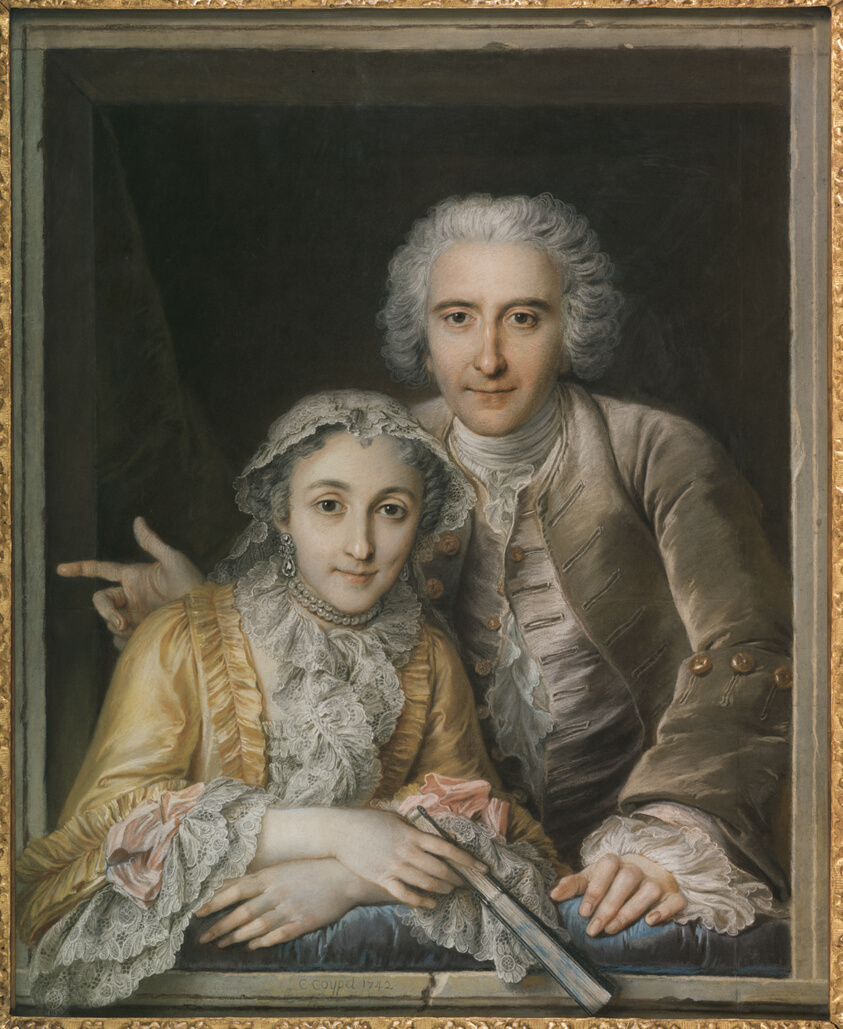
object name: Drawing and Watercolor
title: Portrait of Philippe Coypel and His Wife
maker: Charles-Antoine Coypel (French, 1694-1752)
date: 1742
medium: Pastel on blue laid paper, pieced, laid down on canvas, and stretched on a wood stretcher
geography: France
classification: drawings (visual works); pastel; prints and drawing